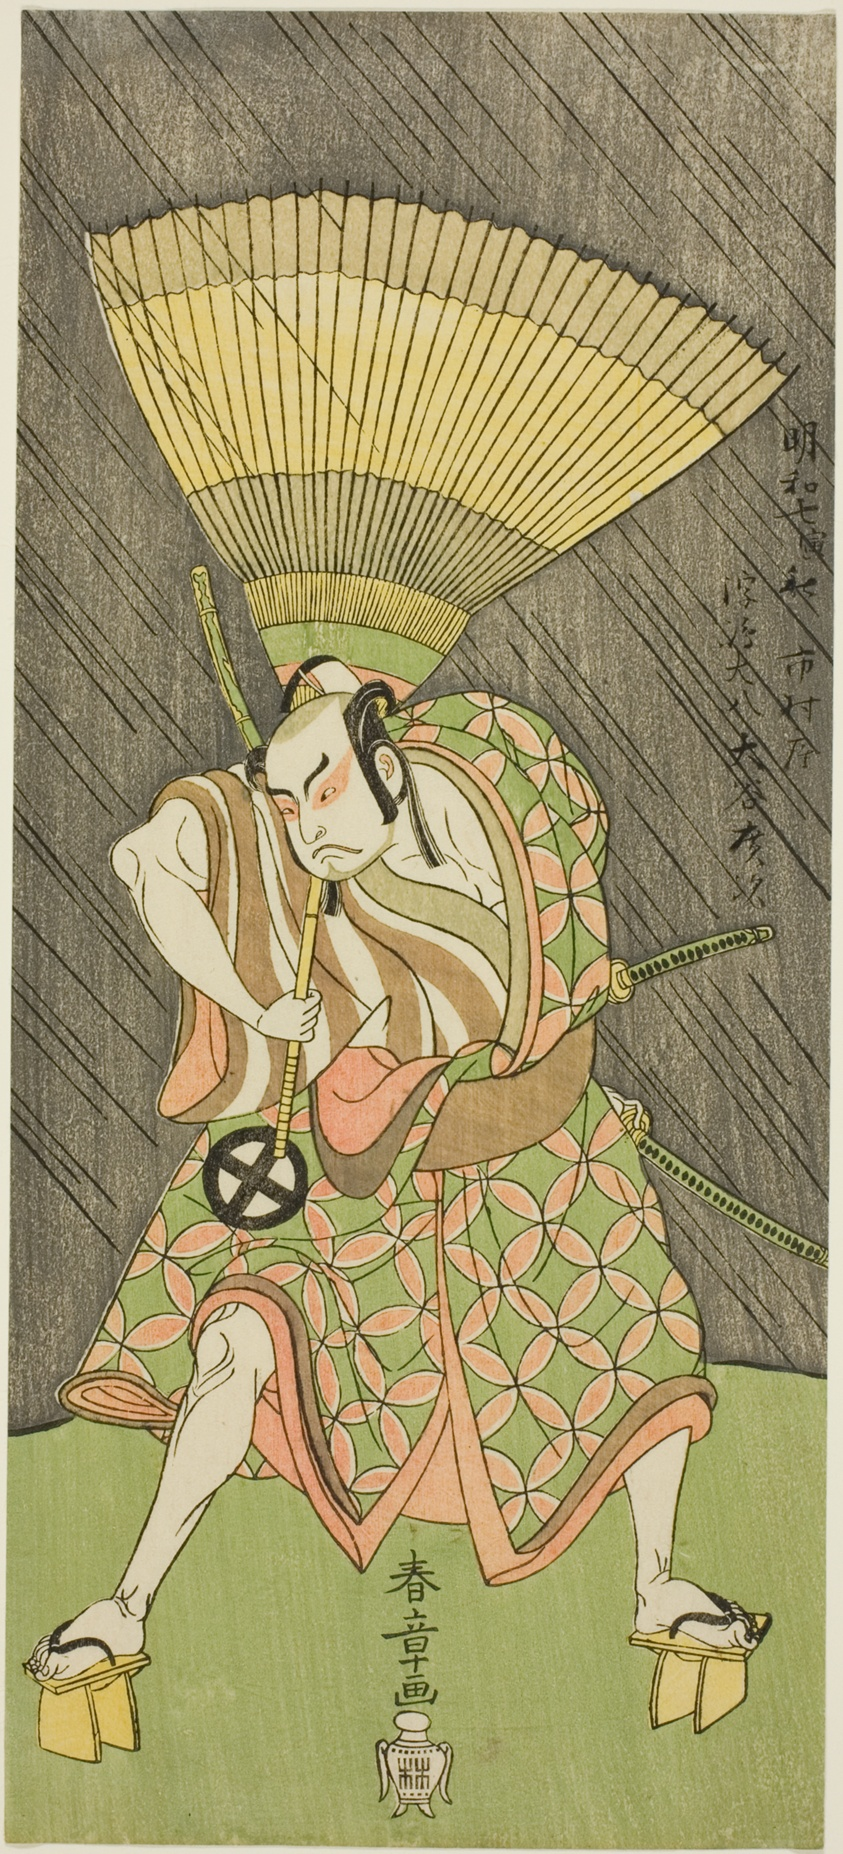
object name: Print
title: Actor Ôtani Hiroji III Probably as Ukishima Daihachi in “Comparing Merits: Festival Day at Soma” (“Shinasadame Sôma no mombi”)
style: Japanese (culture or style)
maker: Katsukawa Shunshô 勝川 春章; Japanese, 1726-1792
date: About 1770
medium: Color woodblock print; hosoban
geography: Japan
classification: woodblock print; print; asian art